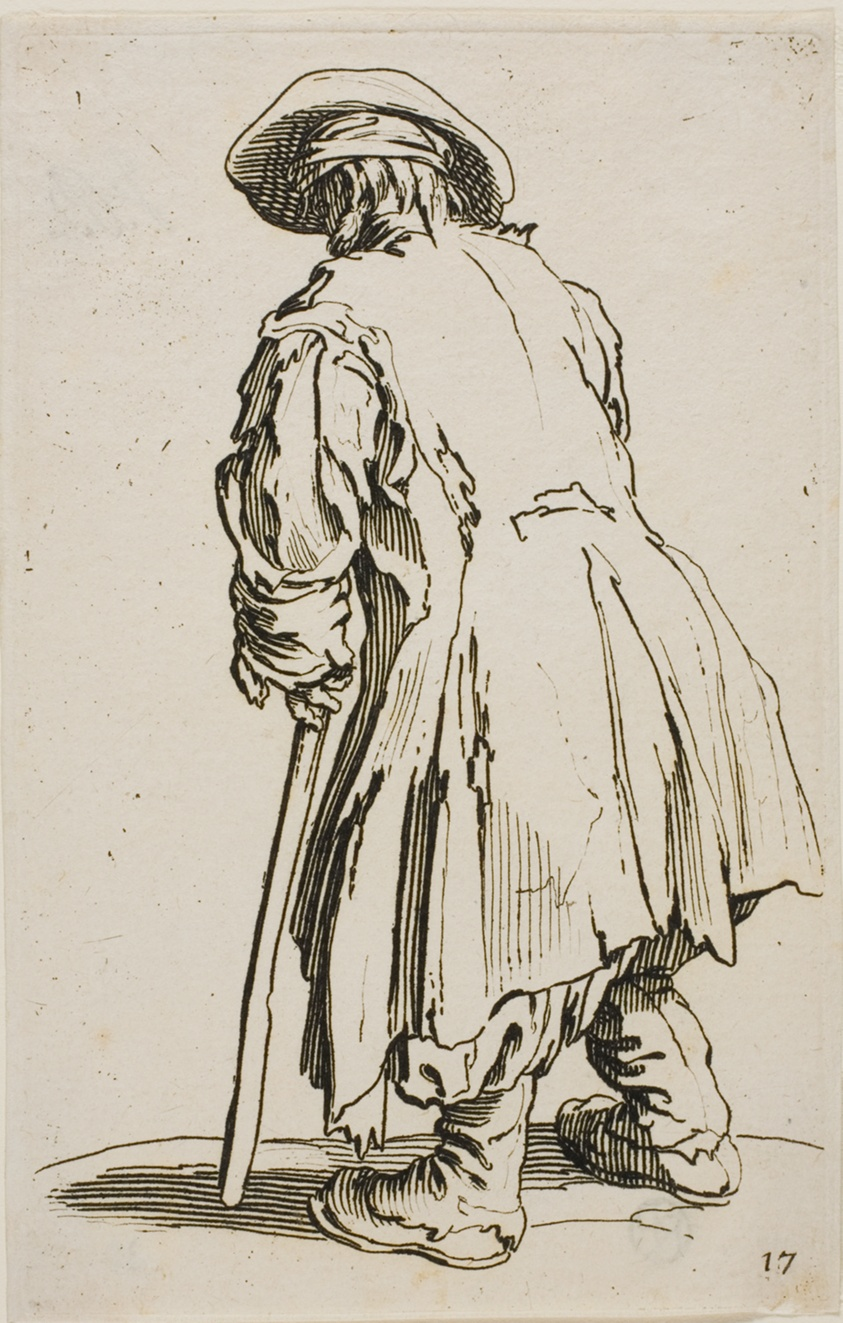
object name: Print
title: The Old Beggar Leaning on his Crutch, plate seventeen from The Beggars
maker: Jacques Callot (French, 1592-1635)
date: c. 1622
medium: Etching on ivory laid paper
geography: France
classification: etching; print; prints and drawing